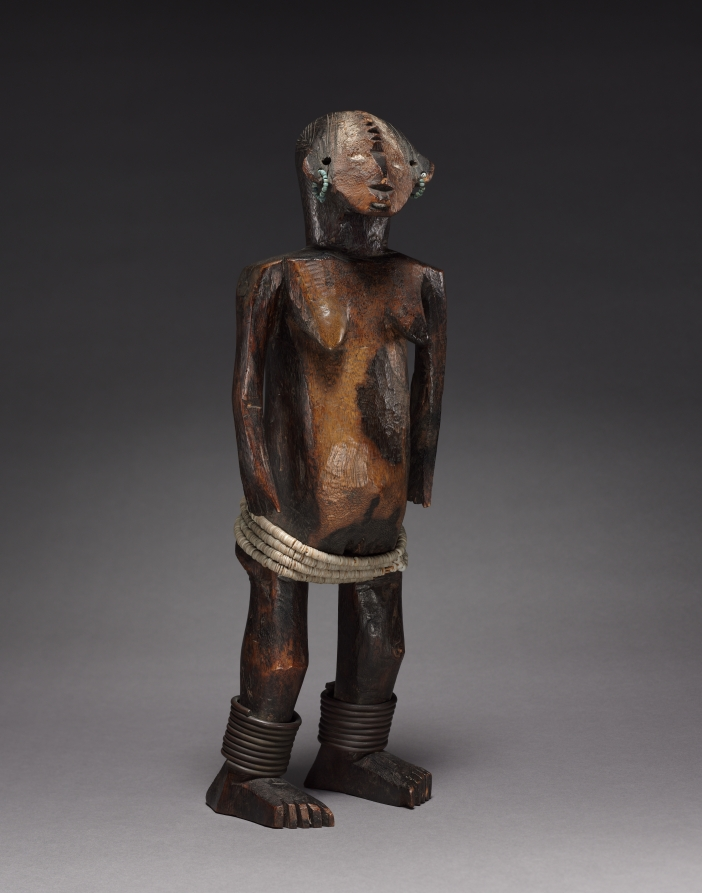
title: Female Figure of a Pair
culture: Africa, Central Africa, Democratic Republic of Congo, probably Ngbandi-style carver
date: late 1800s-early 1900s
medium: Wood, iron alloy, glass beads, plant fiber, and cloth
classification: Sculpture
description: Carving of paired figures is quite well documented among the Ngbandi and its neighbors the Ngbaka-Minagende, where such sculptures are said to represent the mythical ancestor Seto and his sister-wife, Nabo. Field-based research cannot confirm the existence of figurative couples among the Ngbandi.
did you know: Odette Delenne, the collector of this pair, said that these figures reminded her of herself and her husband, René.